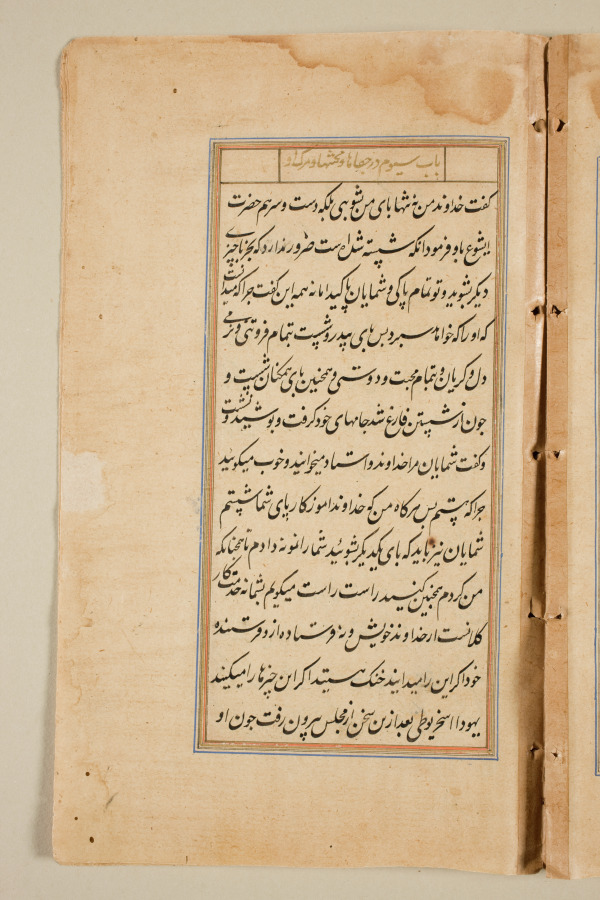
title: Text page from a Mirror of Holiness (Mir’at al-quds) of Father Jerome Xavier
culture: Mughal India, Allahabad, made for Prince Salim (1569–1627)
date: 1602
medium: Ink and gold on paper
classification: Manuscript